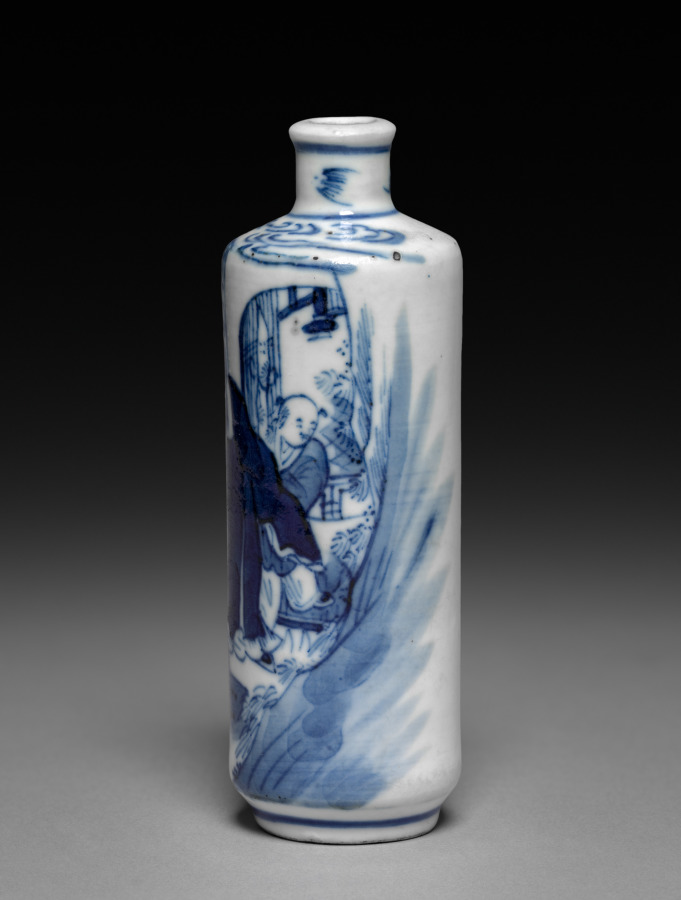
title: Blue and White Snuff Bottle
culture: China, Qing dynasty (1644-1911), Kangxi reign (1661-1722)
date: 1661–1722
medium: porcelain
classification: Ceramic